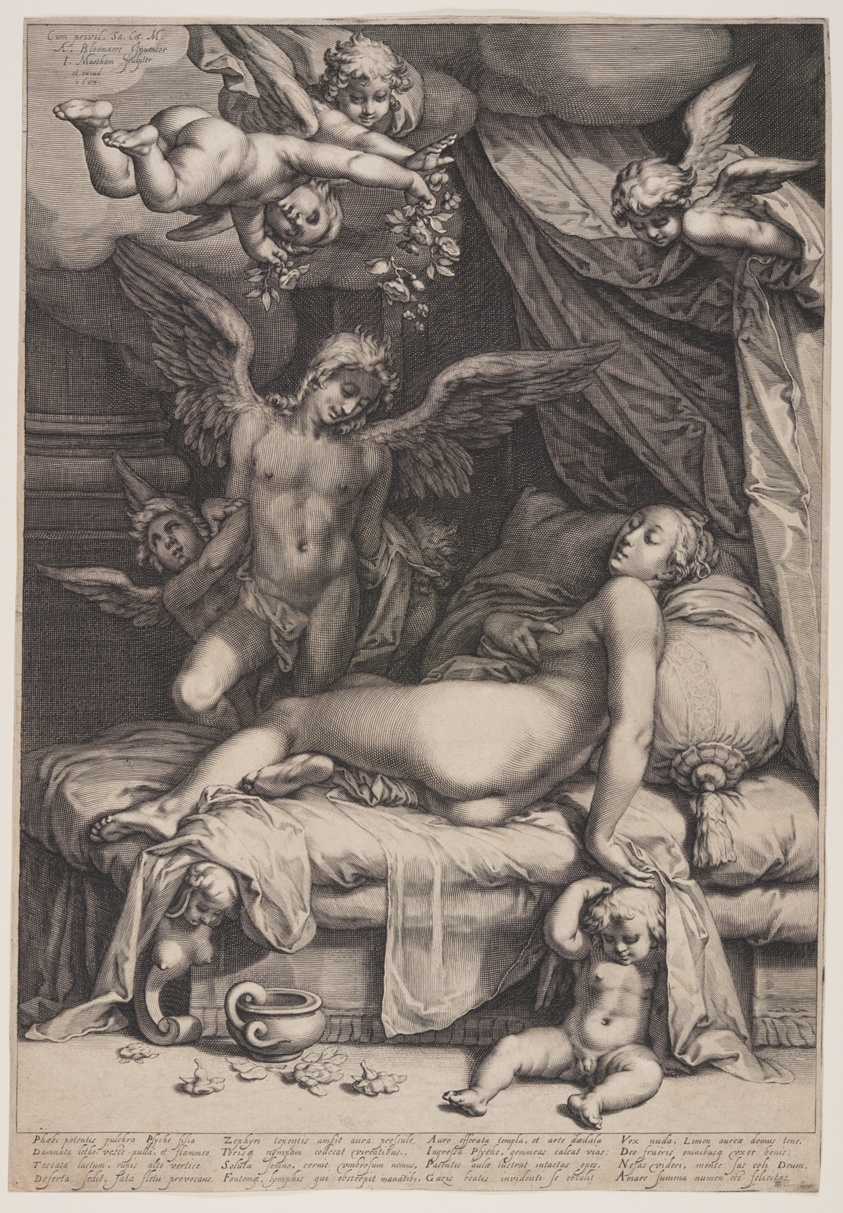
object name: Print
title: Cupid and Psyche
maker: Jacob Matham (Dutch, 1571–1631); after Abraham Bloemaert (Dutch, 1566–1651)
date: 1607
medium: Engraving on ivory laid paper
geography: Netherlands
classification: engraving; paper; print; prints and drawing